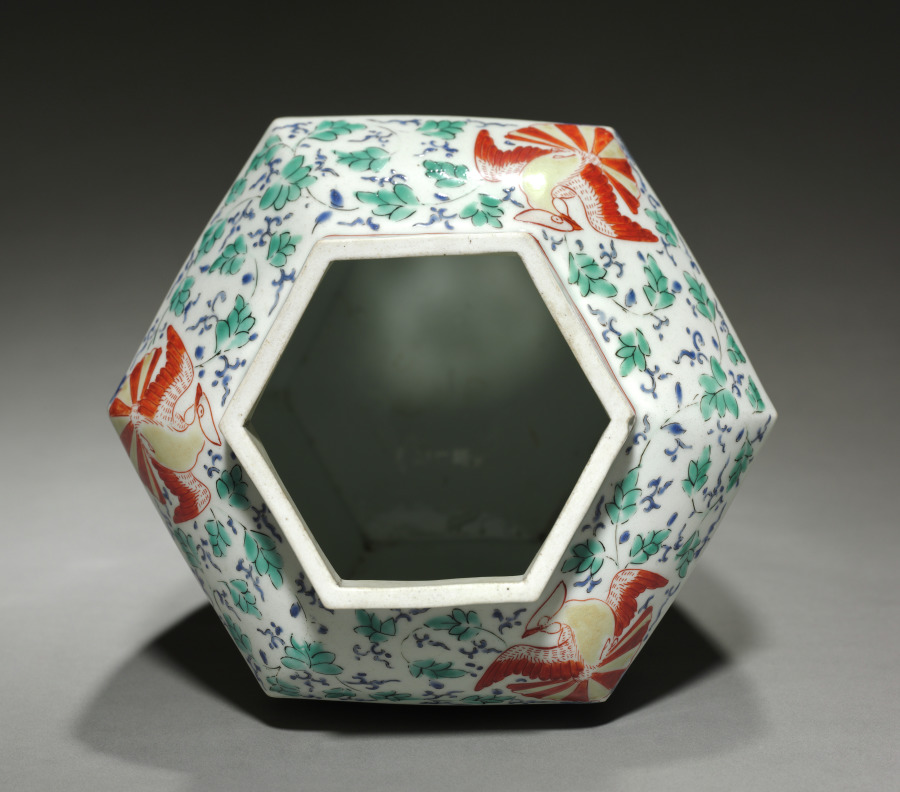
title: Hexagonal Jar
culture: Japan, Edo period (1615–1868)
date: late 1600s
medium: porcelain with overglaze enamel and gold decoration (Hizen ware, Kakiemon type)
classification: Ceramic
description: This pair of jars originally possessed domed lids. Their imposing size, shape, and Chinese-style décor identify them as products made for the European markets in England, Holland, France, and Germany. Indeed many similar examples can be seen in museum and historic house collections in those countries. Such Kakiemon ware also inspired domestic porcelain production in Europe in the 18th and 19th centuries.